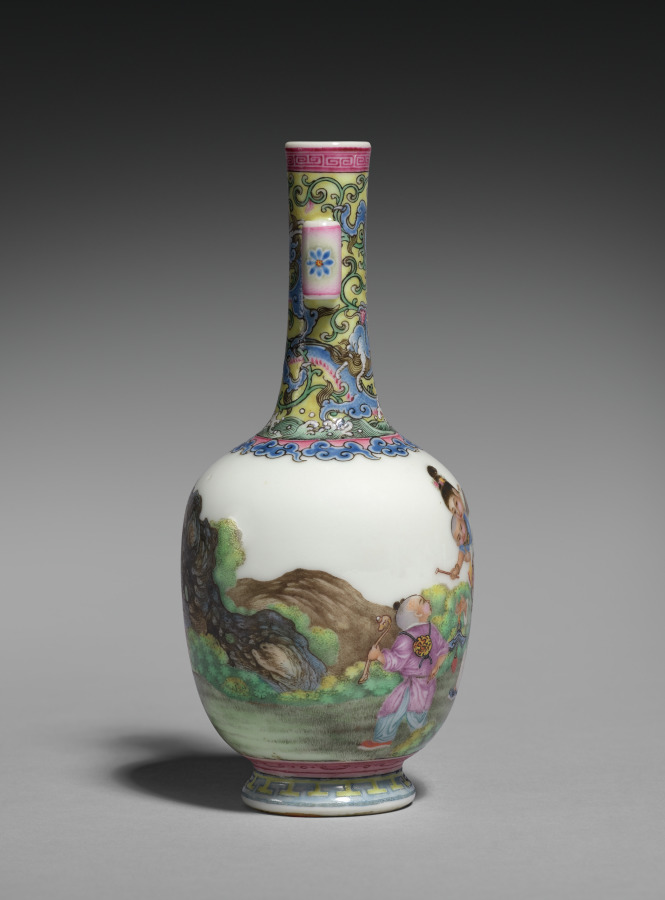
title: Vase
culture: China, Qing dynasty (1644-1911), Qianlong mark and reign (1736-95)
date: 1736–95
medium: Porcelain with decoration in colored fa-lang enamels, Guyuexuan ware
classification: Ceramic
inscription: 乾隆年製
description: The four-character mark on the base of this vase indicates that it was made in Jingdezhen and then sent to Beijing to be decorated in the imperial workshops by painters who were trained in using Western perspective and shading.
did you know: The child in orange has a bun above his ear, while the rest of his head is clean-shaven, like the other children’s.